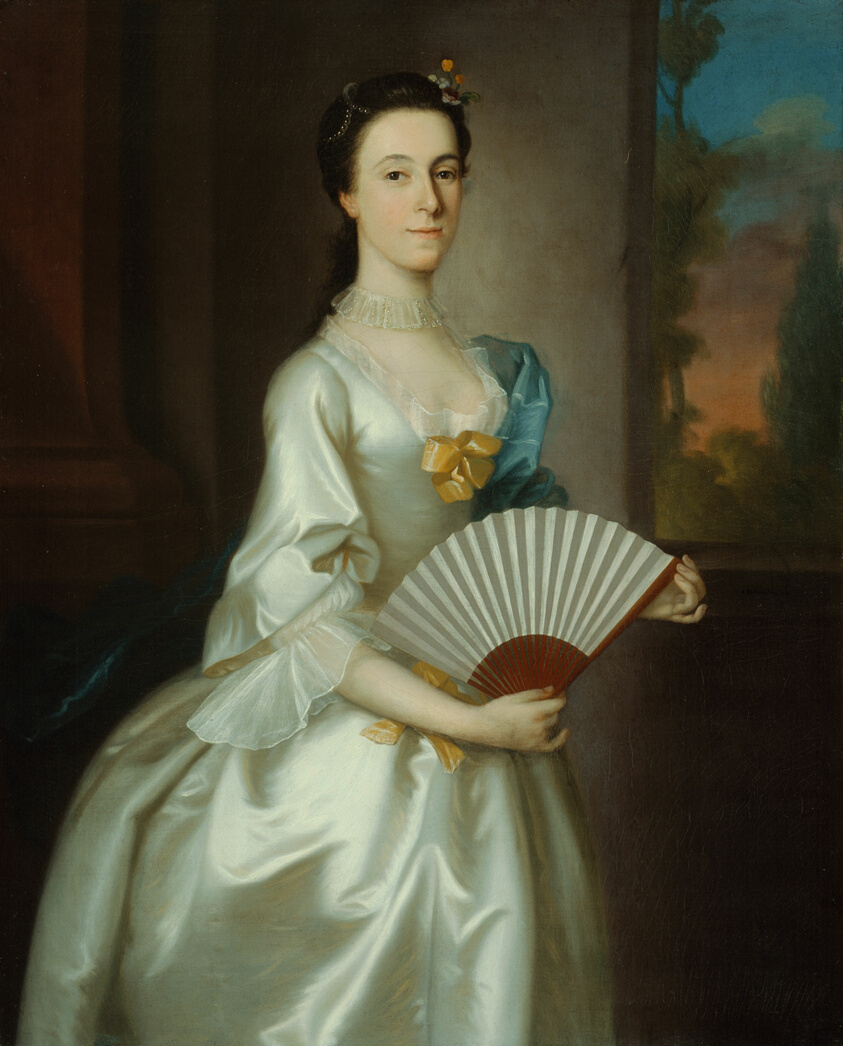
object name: Painting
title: Abigail Chesebrough (Mrs. Alexander Grant)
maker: Joseph Blackburn (English, active in British colonies in North America and Bermuda 1752–64)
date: 1754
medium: Oil on canvas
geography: Newport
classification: painting; american arts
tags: fashion, people, portraits